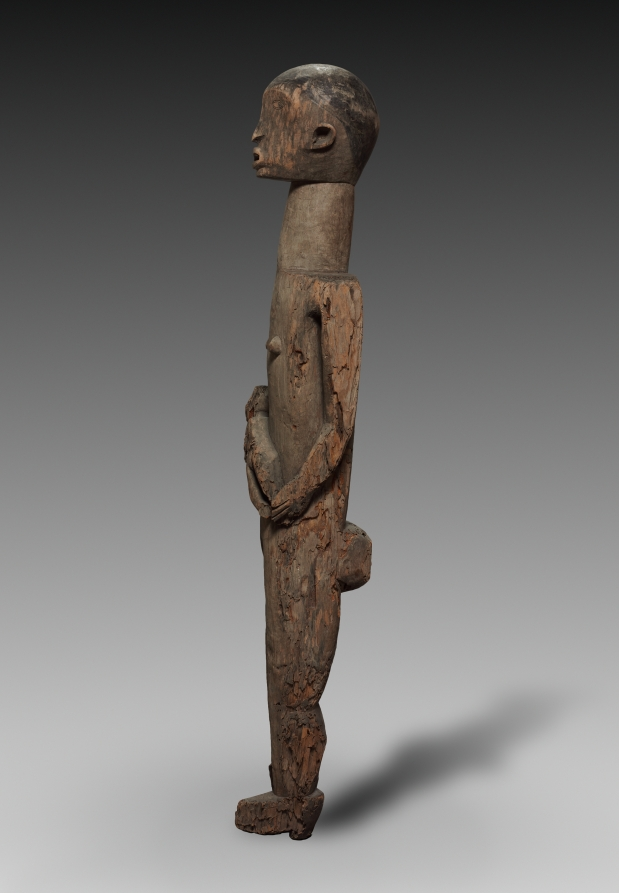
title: Figure of a Pair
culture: Africa, Central Africa, Democratic Republic of the Congo or Central African Republic (most likely), possibly Monzombo-style maker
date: late 1800s–early 1900s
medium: Wood and iron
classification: Sculpture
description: The Ubangi region's history of successive migrations and assimilations has resulted in numerous exchanges of religious beliefs and ritual practices. Despite some stylistic traits, including the heart-shaped faces and the male's crested coiffure, this figure with its female pair is unlike any other in the Ubangian corpus. Based on indirect evidence, the pair is said to represent the culture's primordial couple.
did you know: There are no other carved mother-child figures that originate from the Monzombo ethnic group.